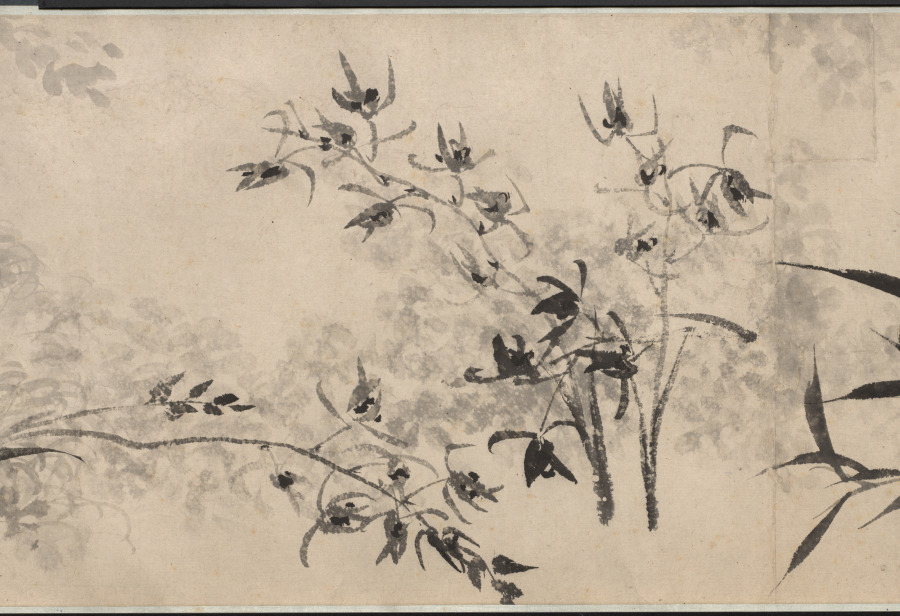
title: Rocks, Orchid, and Bamboo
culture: China, Qing dynasty (1644-1911)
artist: Shitao (Chinese, 1642–1707)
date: 1662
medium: handscroll; ink on paper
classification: Painting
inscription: Title colophon in four characters with signature and two seals on gold-flecked paper.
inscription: Artist's signature, inscription (with date of 1662), five seals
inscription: Colophon with two seals.